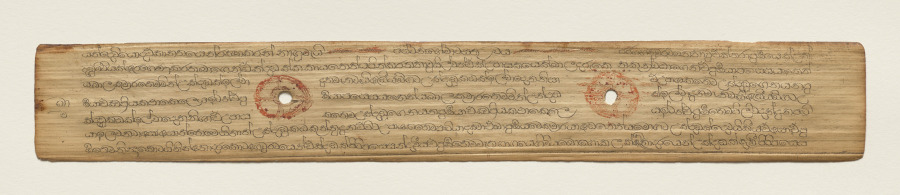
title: Leaf from a Buddhist Manuscript (recto)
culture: Sri Lanka, Singhalese, Late 17th century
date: c. 1700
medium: fiber paper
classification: Manuscript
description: Palm leaf material is still used for manuscripts in Sri Lanka. The palm leaves are prepared first by boiling them, drying them in the sun, and then rubbing them with oils. Scribes then use a metal stylus to incise the text. Then charcoal powder is wiped across the pages, filling in only the inscribed lines.